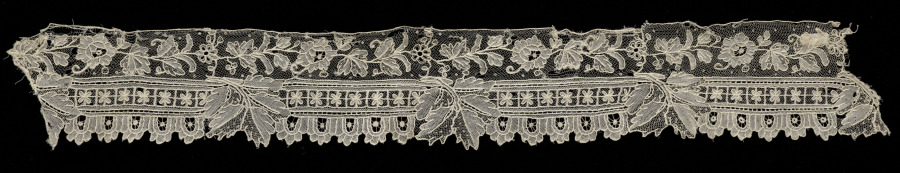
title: Lace Strip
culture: Belgium, Brussels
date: 1800s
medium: Needle lace (point de gaze)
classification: Lace